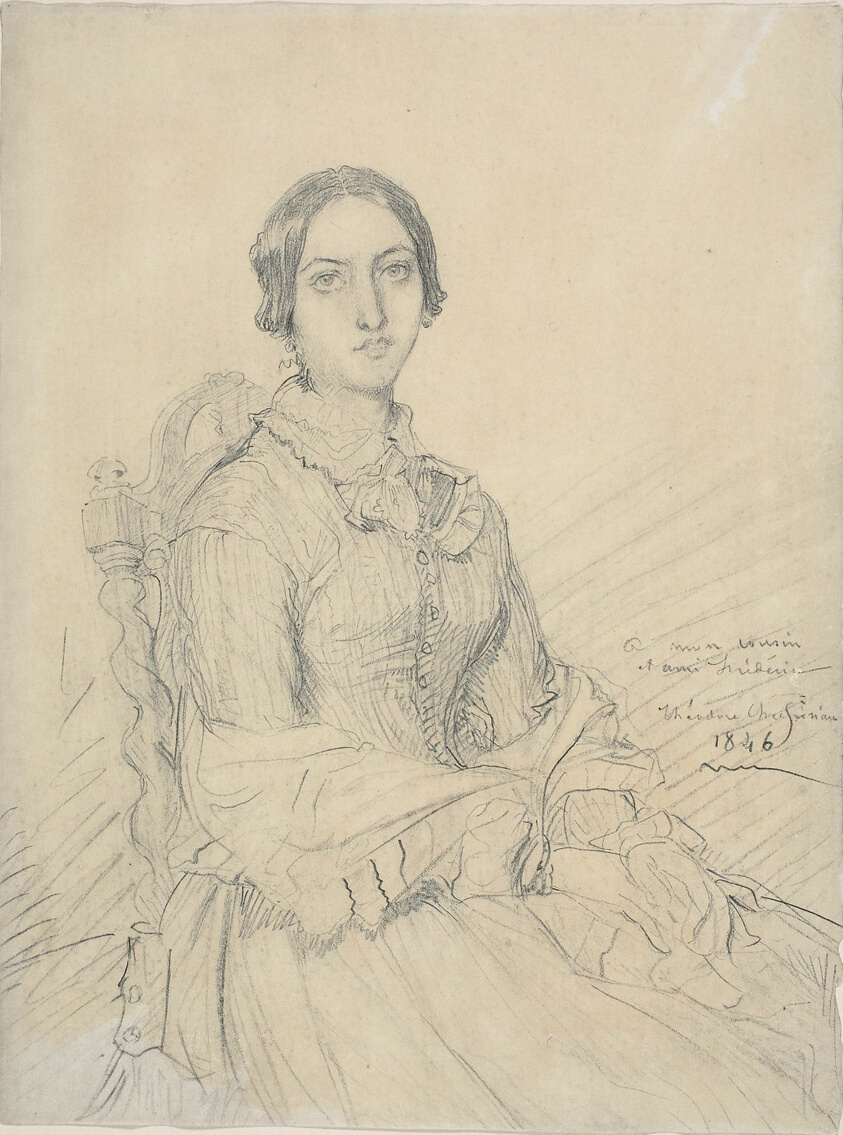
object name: Drawing and Watercolor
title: Portrait of the Baroness Chassériau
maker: Théodore Chassériau (French, 1819-1856)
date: 1846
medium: Graphite on cream wove paper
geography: France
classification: graphite; drawings (visual works); prints and drawing